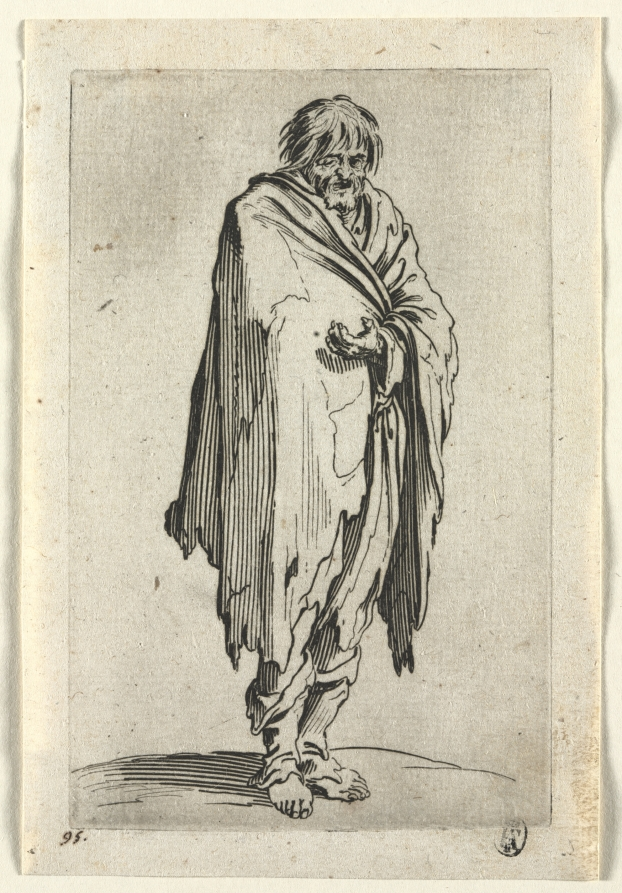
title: The Beggars: Beggar without Hat or Shoes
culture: France, 17th century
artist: Jacques Callot (French, 1592–1635)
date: c. 1623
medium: etching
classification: Print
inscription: Inscribed lower left in pen and brown ink: "95."